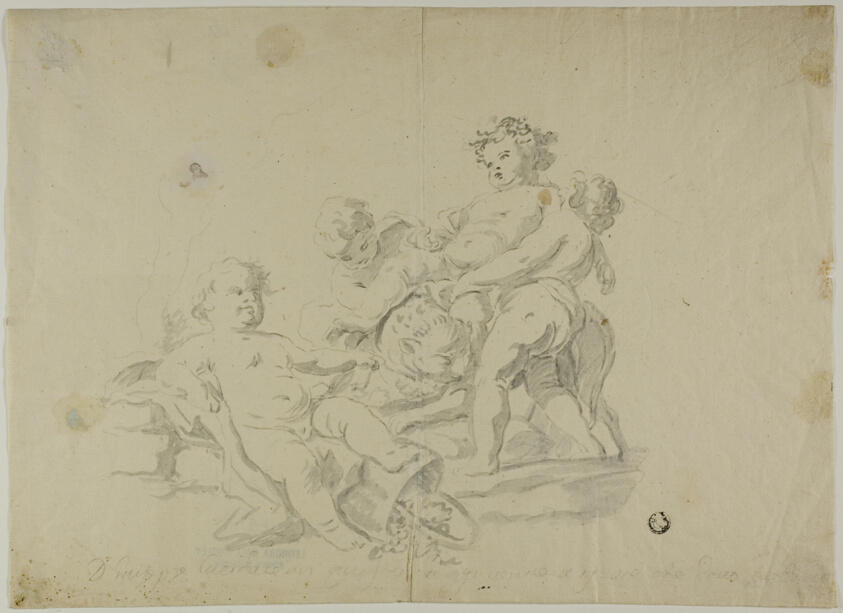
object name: Drawing and Watercolor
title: Putti Bacchanal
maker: Attributed to Carlo Amalfi; Italian, 18th century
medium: Black chalk, with brush and brown wash, on ivory laid paper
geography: Italy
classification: ink or chalk wash; drawings (visual works); prints and drawing